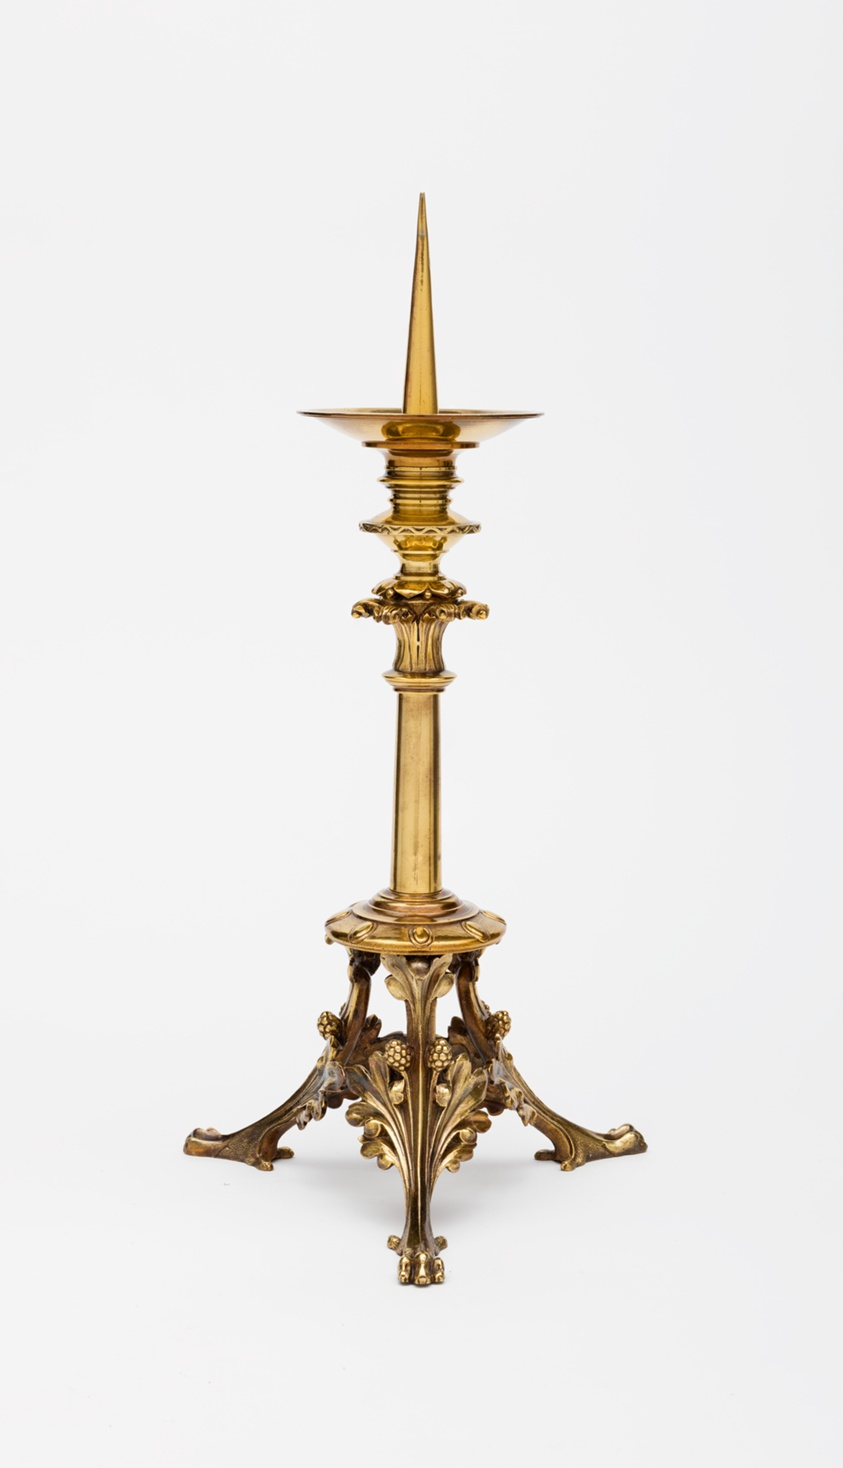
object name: Metalwork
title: Pair of Altar Candlesticks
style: gothic revival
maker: Eugène Emmanuel Viollet-le-Duc; French, 1814–1879; Made by Placide-Benoît-Marie Poussielgue-Rusand; French, 1824–1889; Paris, France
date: 1862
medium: Gilded cast bronze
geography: Paris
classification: altar candlesticks; candlesticks; candleholder; metalwork